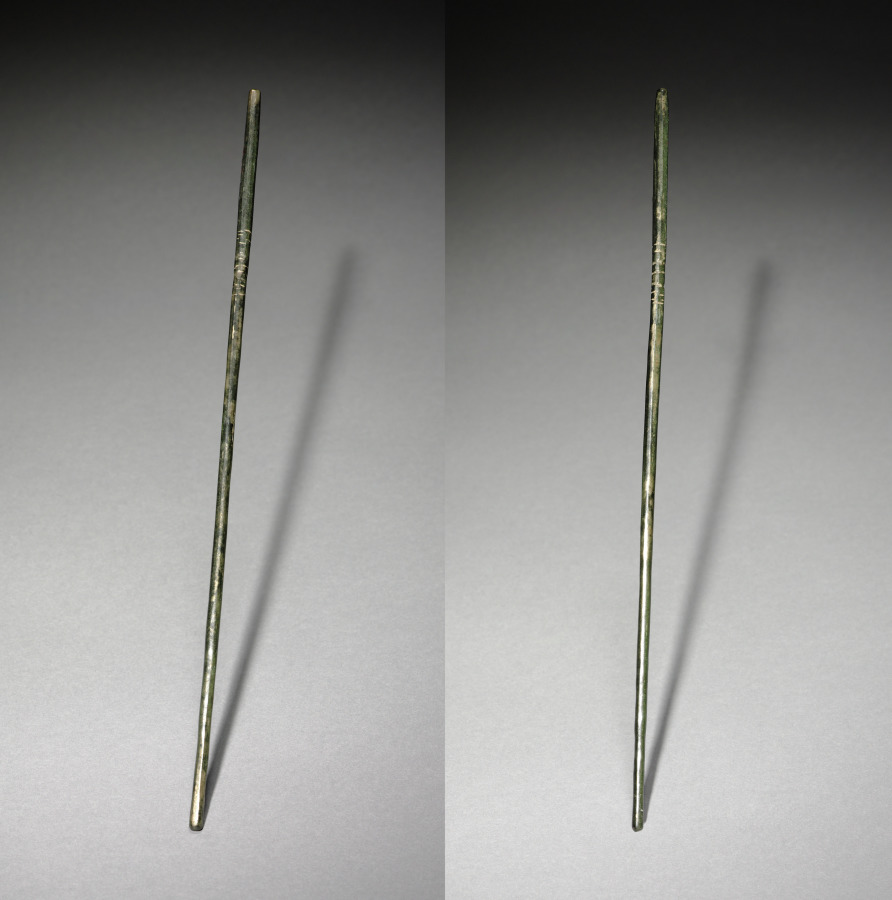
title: Pair of Chopsticks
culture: Korea, Goryeo dynasty (918–1392)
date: 918–1392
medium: bronze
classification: Metalwork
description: In Korea, chopsticks made of metal such as brass, silver, and gold were excavated from ancient tombs and ruins dated to the 500s at the earliest. Burial goods often include utilitarian objects such as table wares and utensils because the dead were believed to need them in the afterlife.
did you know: In contrast to the Chinese and Japanese, Koreans still prefer metal chopsticks (stainless steel and brass) to wooden ones.